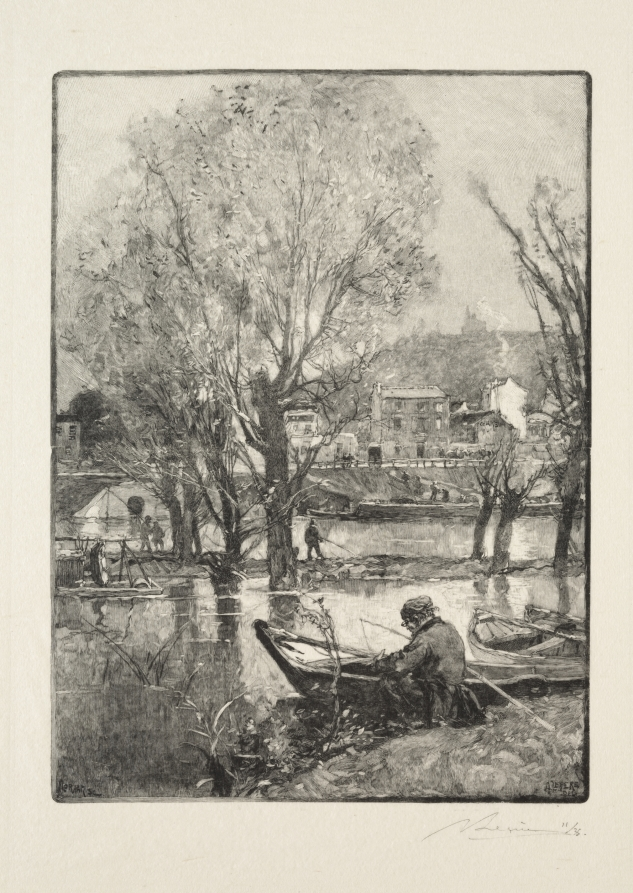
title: Un coin de l'Île de Billancourt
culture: France, 19th-20th century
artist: Auguste Louis Lepère (French, 1849–1918)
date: 1886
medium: wood engraving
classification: Print